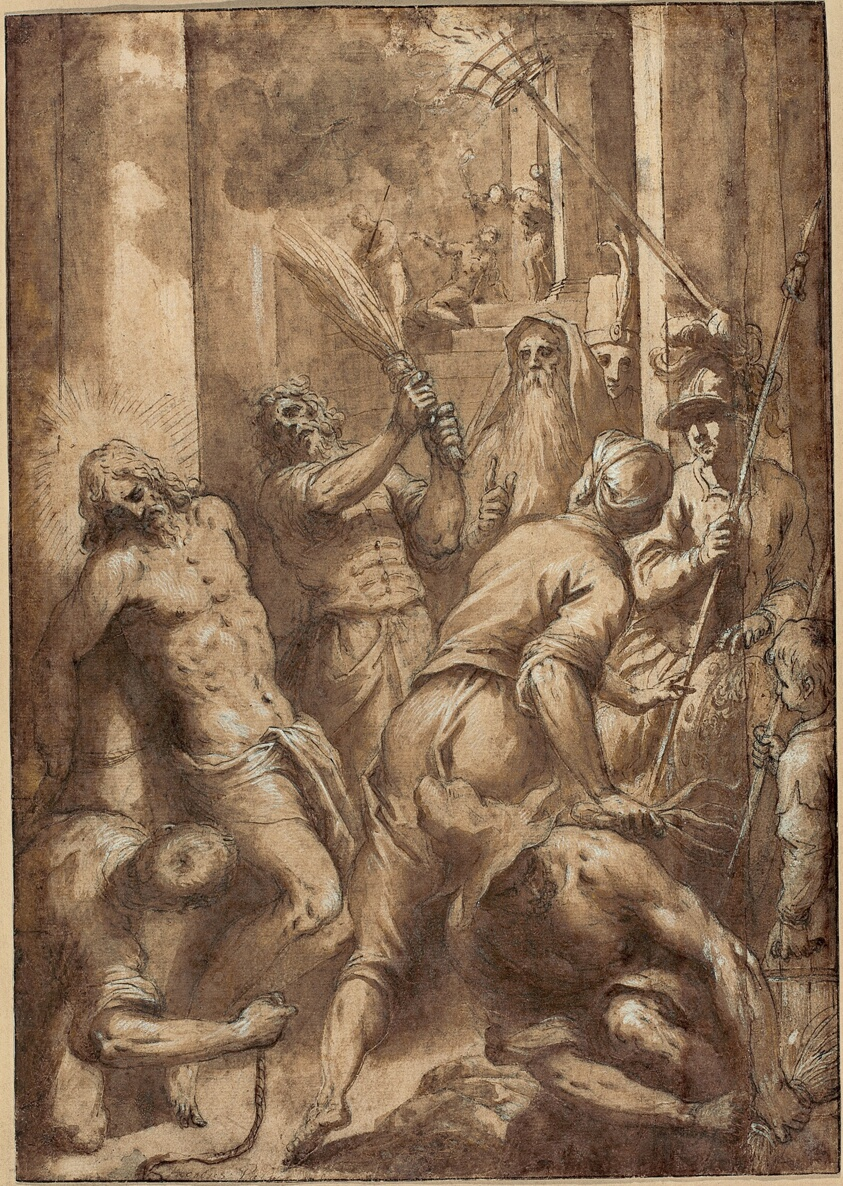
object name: Drawing and Watercolor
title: The Flagellation of Christ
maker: Jacopo Palma il Giovane; Italian, c. 1548–1628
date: by 1594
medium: Pen and brown and black ink and brush and iron-gall ink wash, over black chalk, heightened with white gouache, on tan laid paper, pieced along right edge and incised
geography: Italy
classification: drawing; paper; prints and drawing; brush and ink; pen and ink drawings; brush and wash